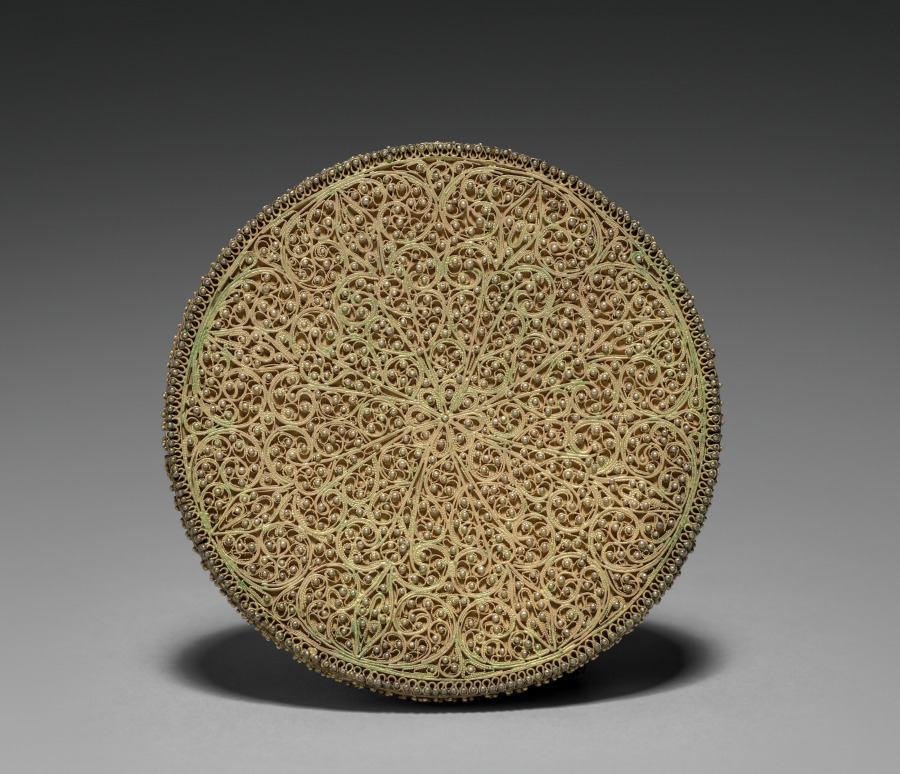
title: Box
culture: Germany ?, late 18th century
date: late 1700s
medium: enamel on copper with gilt metal mounts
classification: Miscellaneous